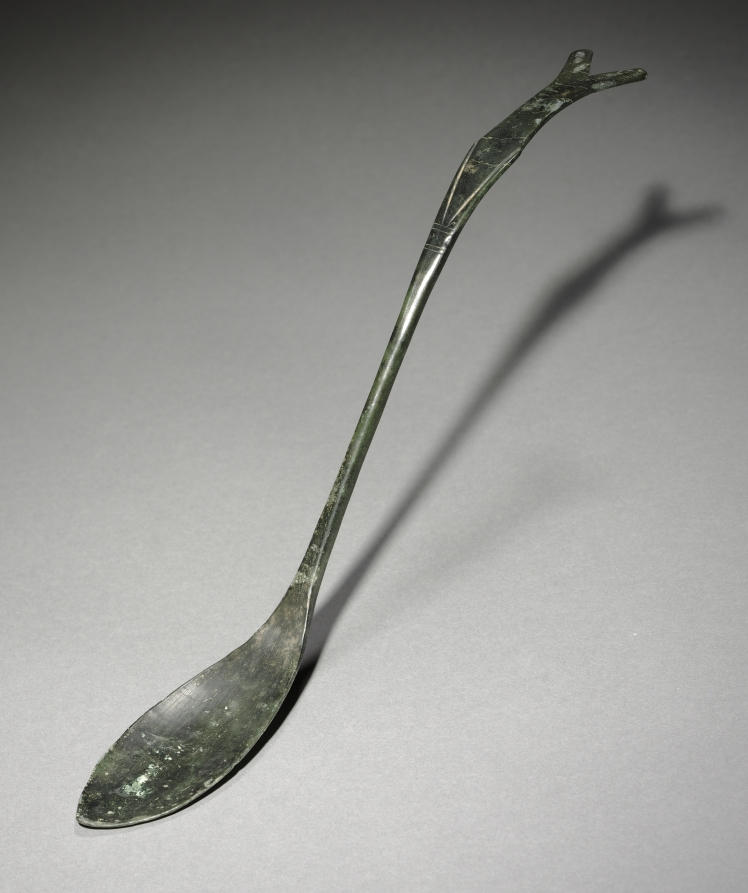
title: Spoon with Fish-Tail Design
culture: Korea, Goryeo dynasty (918–1392)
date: 918–1392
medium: bronze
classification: Metalwork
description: Many of Goryeo period spoons like this one feature a curved handle that splits into a jagged fishtail design. This fishtail design is not unique to Korea; it was also widely used in the area under the rule of two non-Han Chinese states: Liao (907–1125) and Jin (1115–1234). These seemingly ordinary objects testify to exciting material interactions between the Goryeo dynasty and non-Han Chinese northern states, which were often omitted from the official records.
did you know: Bronze spoons are the most common burial item. Scholars have proposed that toward the end of the 14th century, Koreans enjoyed meat-based soups more than any other dishes, explaining why spoons became common household items as well as burial goods.